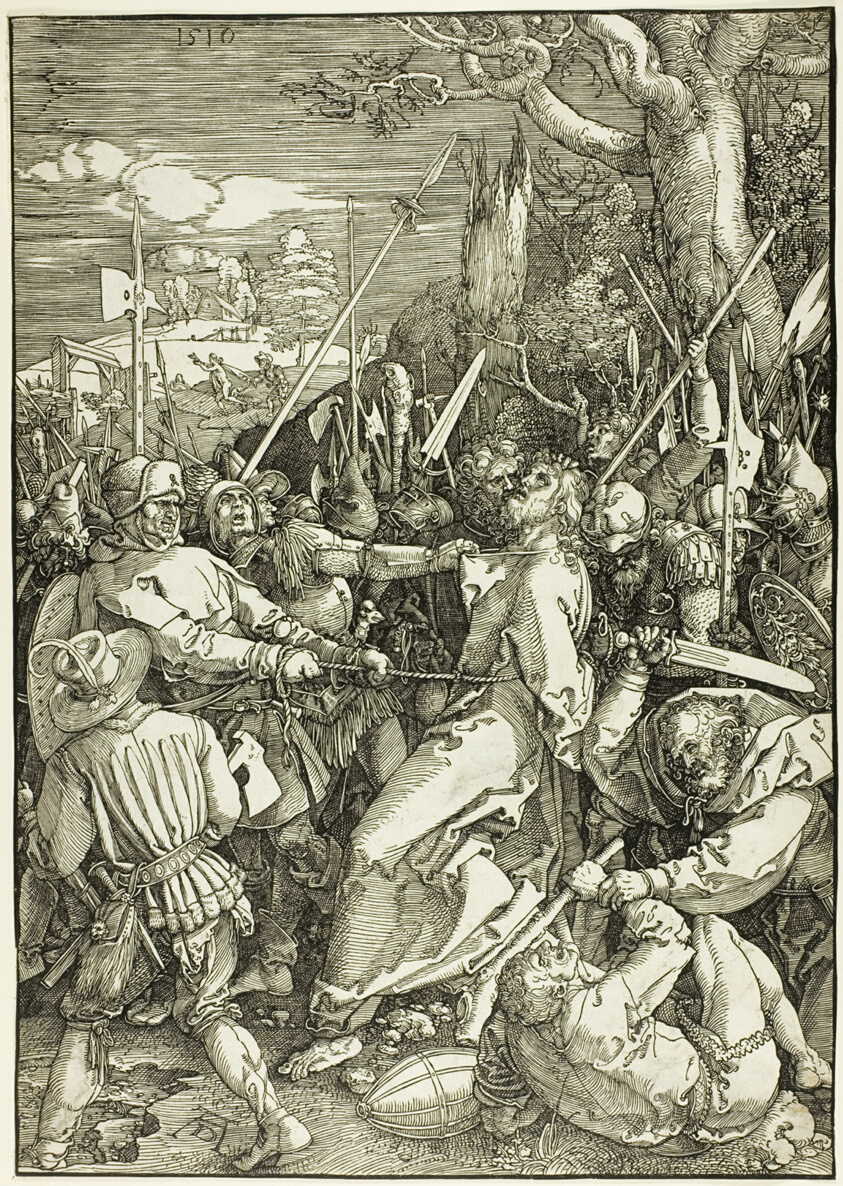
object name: Print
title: The Betrayal of Christ, from The Large Passion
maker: Albrecht Dürer (German, 1471-1528)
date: 1510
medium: Woodcut in black on ivory laid paper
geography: Germany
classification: woodcut; print; prints and drawing; paper